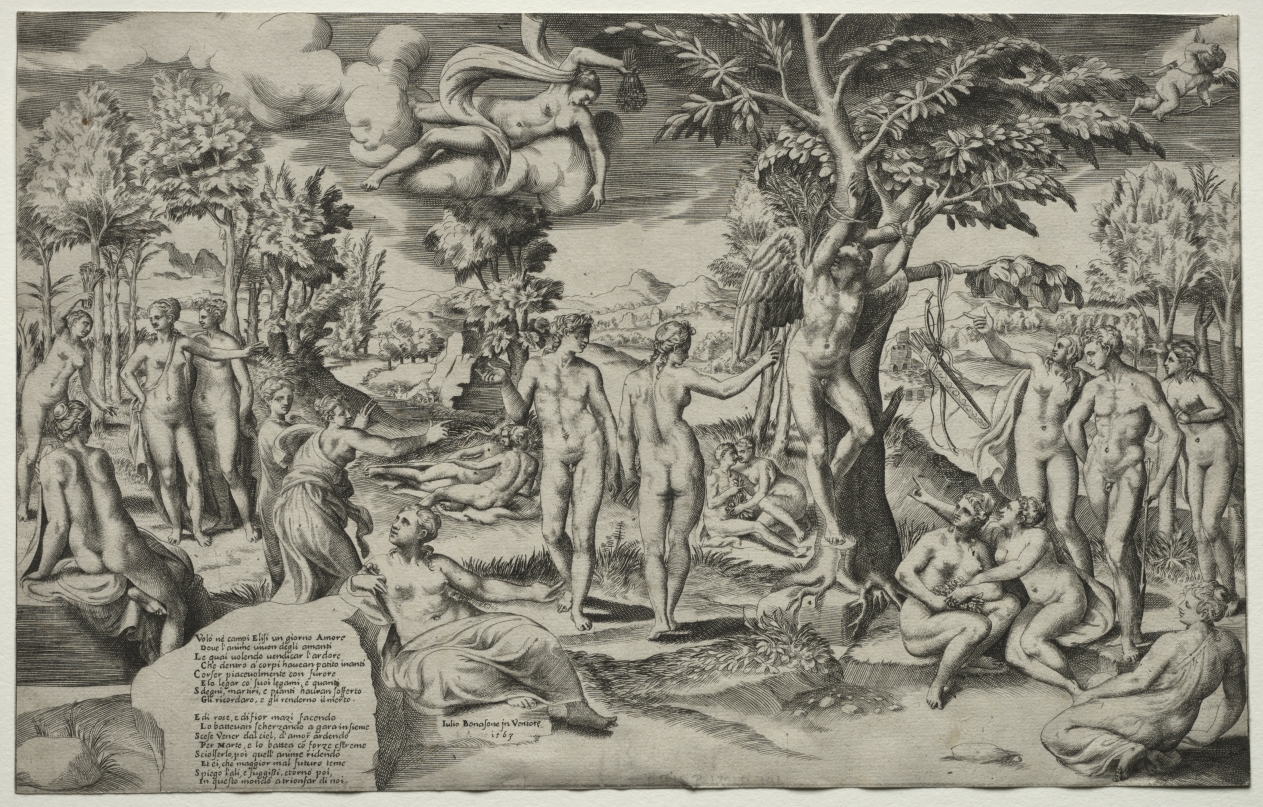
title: Love in the Elysian Fields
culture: Italy, 16th century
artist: Giulio Bonasone (Italian, c. 1510–after 1576)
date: 1563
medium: engraving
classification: Print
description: In this engraving Cupid is shown being punished by those he tormented, a popular subject of Hellenistic art and literature revived in the Renaissance. Bound to a tree in the Elysian Fields, a dwelling place for the virtuous dead, Cupid is watched by the laughing souls of lovers as Venus descends from the sky to beat him with a bouquet of flowers in retribution for the great pain that passion often inflicts. According to the verses on the rock at left, after being whipped Cupid will be set free to escape again "to this world where he triumphs over us."